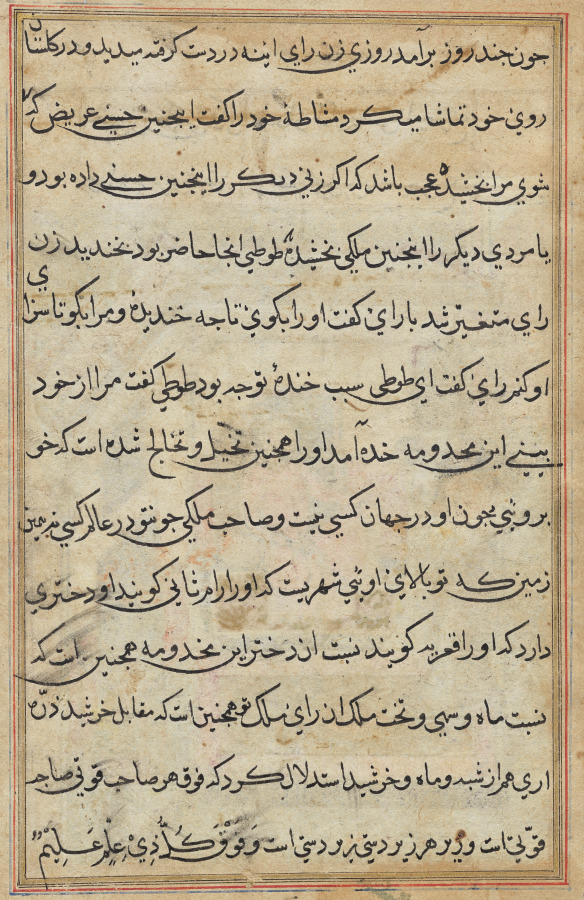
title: Page from Tales of a Parrot (Tuti-nama): text page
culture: Mughal India, court of Akbar (reigned 1556–1605)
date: c. 1560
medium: gum tempera, ink, and gold on paper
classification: Painting